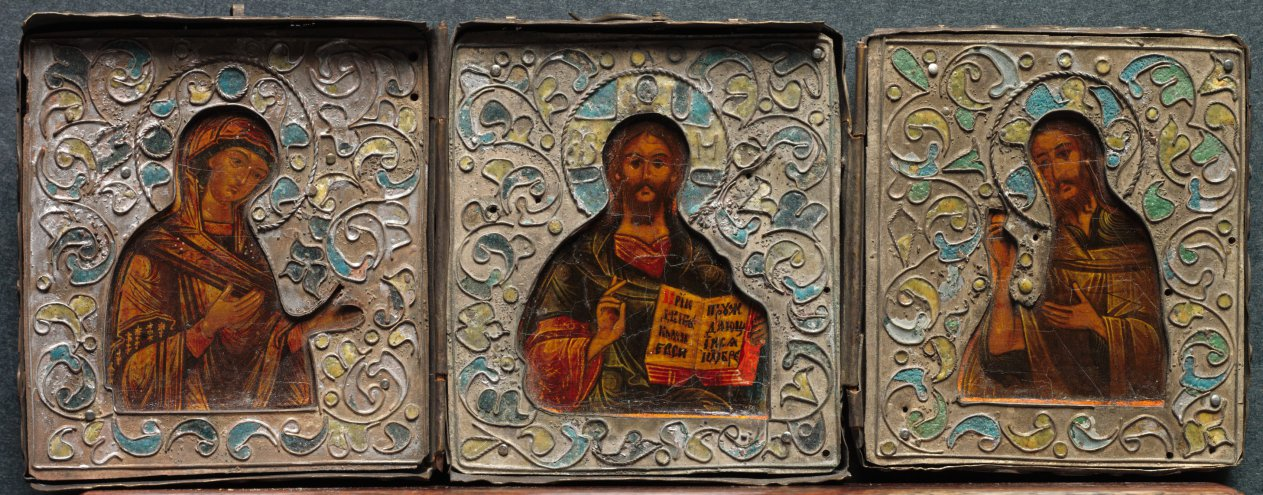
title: Triptych with Christ, the Virgin, and St. John the Evangelist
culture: Russia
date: 1800s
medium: pigment on wood, in cloisonné enamelled insert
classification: Painting